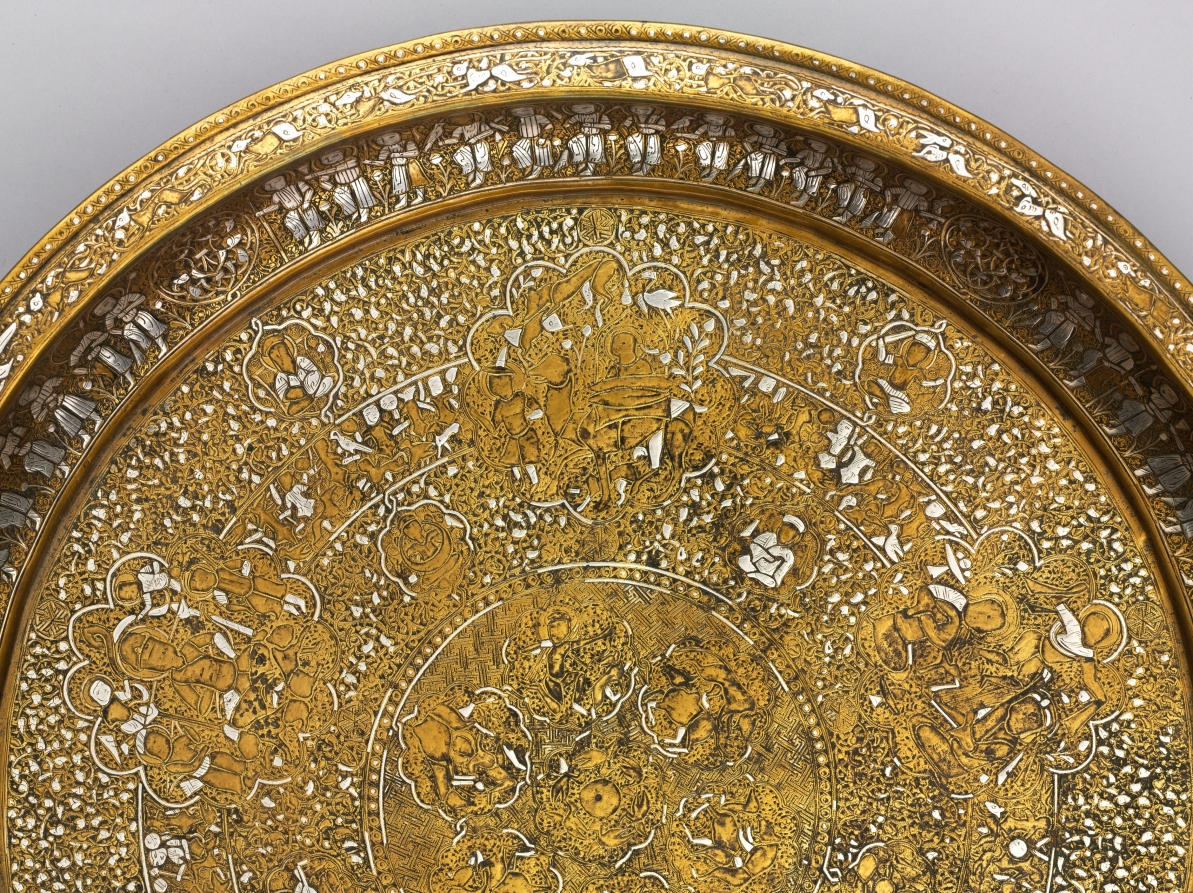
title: Tray Portraying Courtly Pleasures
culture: Syria, Ayyubid period (1171–1260)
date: 1240s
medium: sheet brass inlaid with silver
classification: Metalwork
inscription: The presence of ligatures in the narrow circular bands with interconnected human and animal figures suggests this may be a degenerate form of animated script. It is indecipherable.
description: This tray features images of courtly life interspersed with astronomical symbols. The scenes contained within large multilobed medallions display an enthroned prince with lions at his feet, a banquet, a hunt, dancers, and musicians. Contained within the concentric circles there are also references to solar and lunar motifs, including figures holding sunbursts and lunar crescents. This tray is made of a single sheet of brass and the silver inlay, which is best preserved on the tray’s inner curve, suggests its original brilliance.